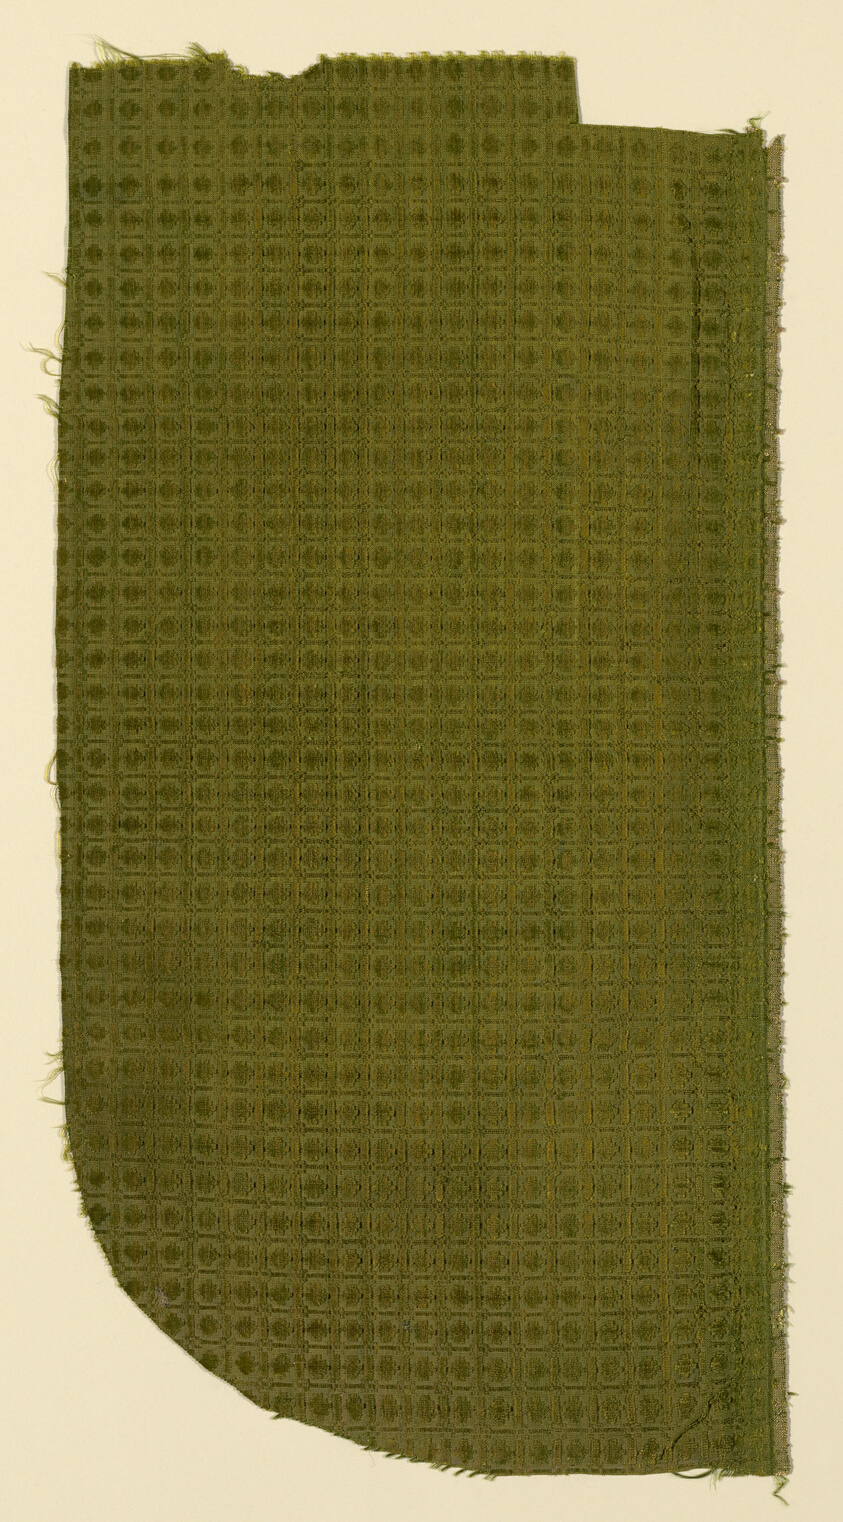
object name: Textile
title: Fragments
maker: Spain or Italy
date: 16th century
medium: silk; cut, voided velvet against plain weave foundation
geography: Spain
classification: textile; weaving - velvet; weaving